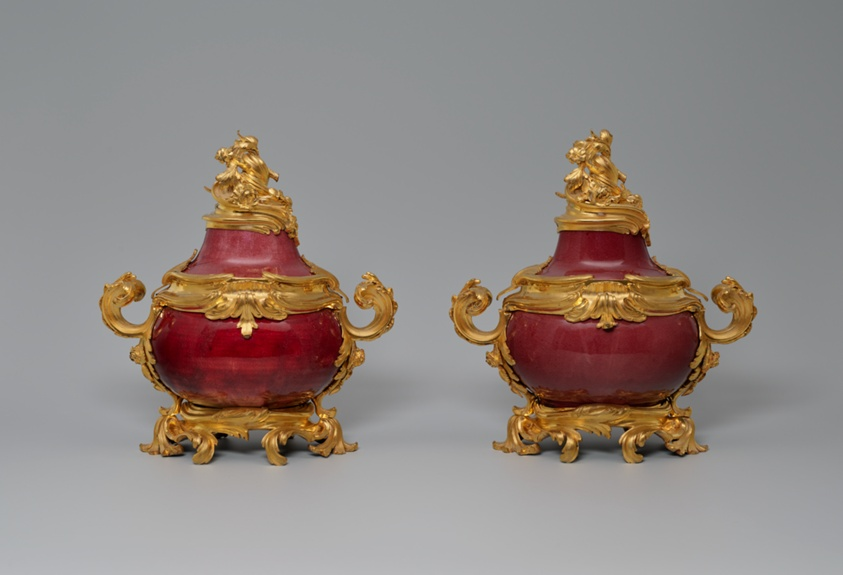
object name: Ceramics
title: Pair of Mounted Vases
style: Rococo, 18th Century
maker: China; Mounts attributed to Jean-Claude Duplessis (French, c. 1695–1774)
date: c. 1750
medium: Hard paste porcelain and gilt bronze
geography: China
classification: vase; france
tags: ormolu, China, foliage